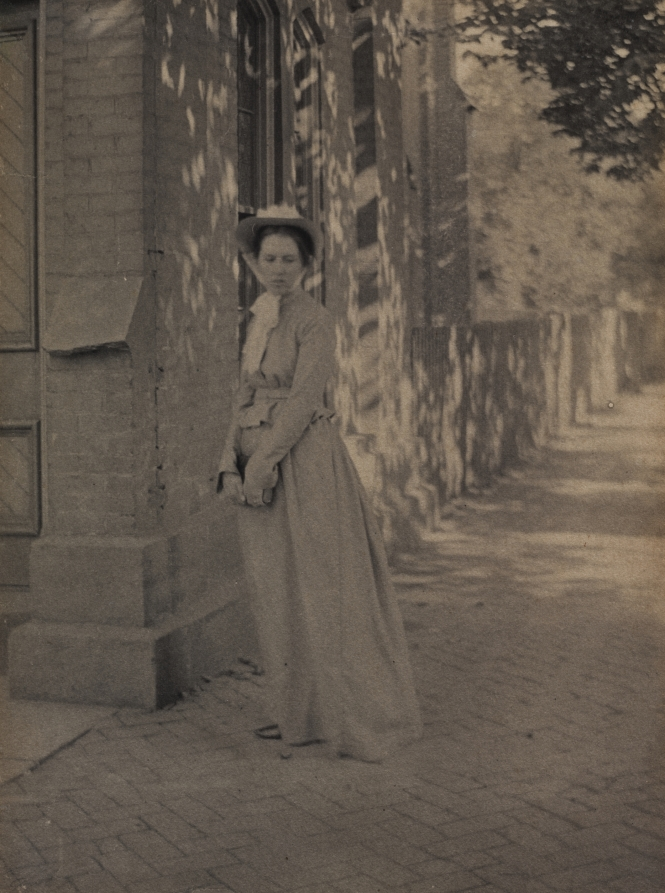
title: Letitia Felix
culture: America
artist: Clarence H. White (American, 1871–1925)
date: c. 1898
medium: platinum print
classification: Photograph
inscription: Written in pencil on verso: "26 [circled]"; "Portrait of Letty Felix / by Clarence White / Taken about 1898"